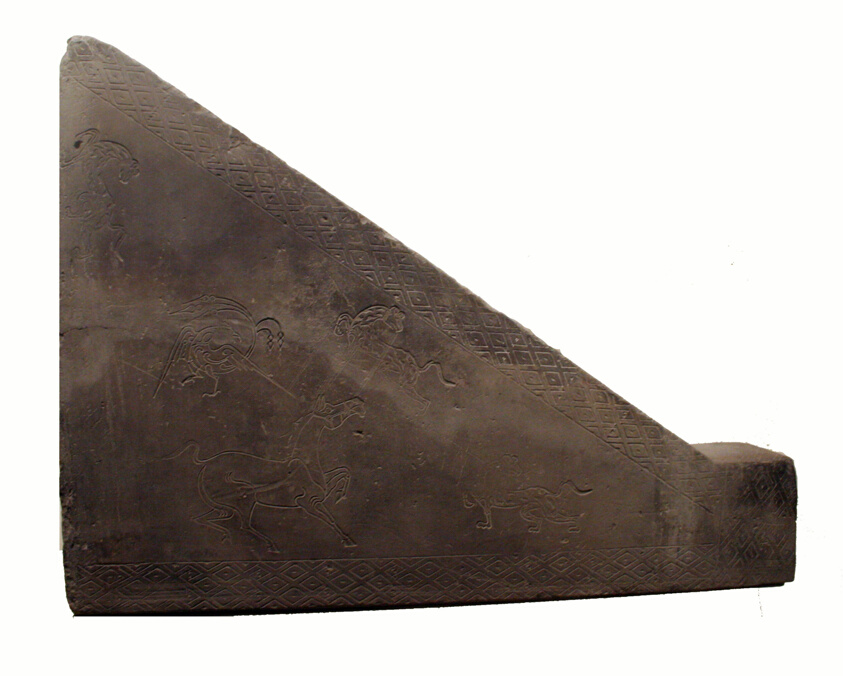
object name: Architectural fragment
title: Triangular Brick with Horse, Phoenix, and Tigers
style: Chinese (culture or style)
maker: China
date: Western Han dynasty (206 B.C.–A.D. 220), c. 1st century B.C.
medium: Earthenware with impressed decoration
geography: China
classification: earthenware; ceramics; asian art; architectural fragment